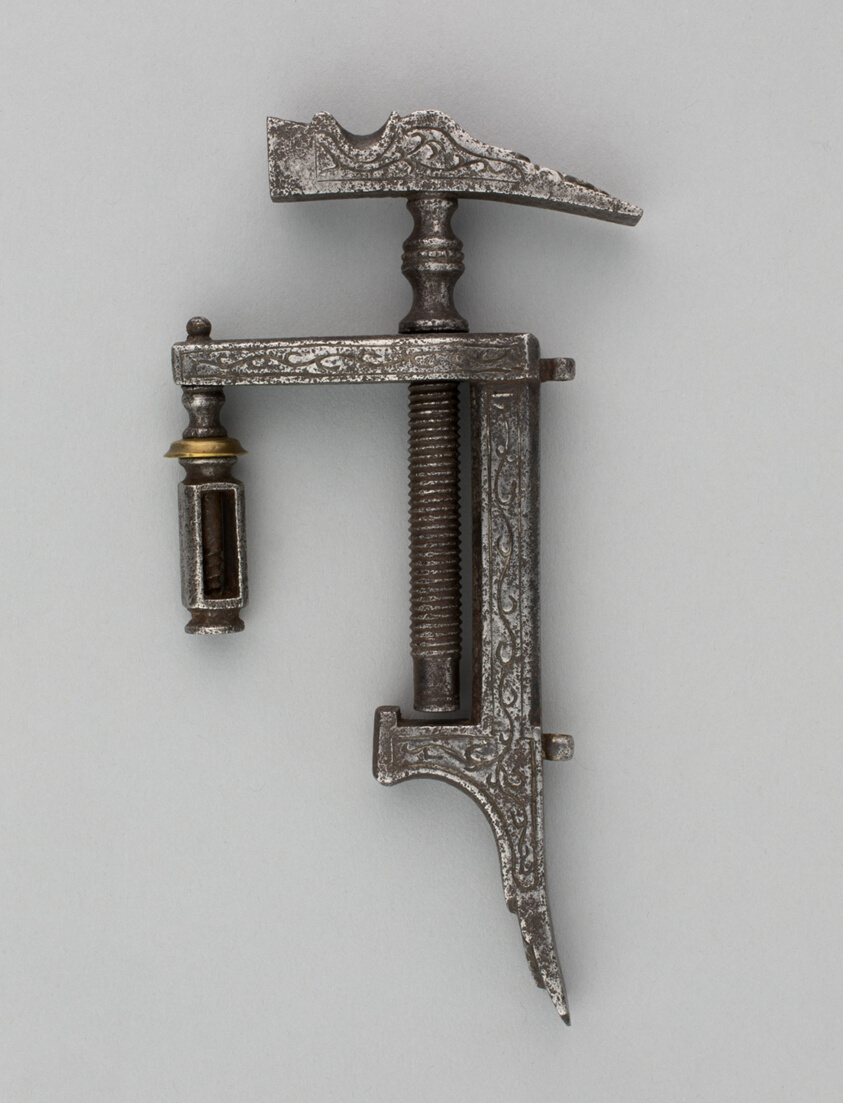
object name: Arms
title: Combined Wheellock Spanner, Turnscrew, and Adjustable Powder Measure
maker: European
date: 17th century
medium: Iron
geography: Europe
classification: firearm-accessory; arms; arms and armor